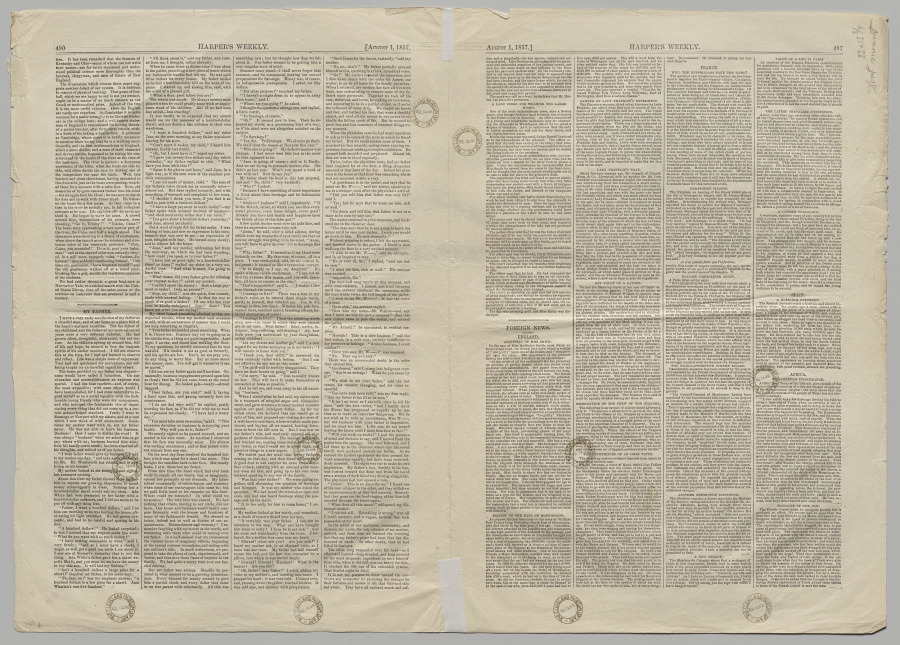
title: The Match between the Sophs and Freshmen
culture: America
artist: Winslow Homer (American, 1836–1910)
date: 1857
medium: wood engraving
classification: Print